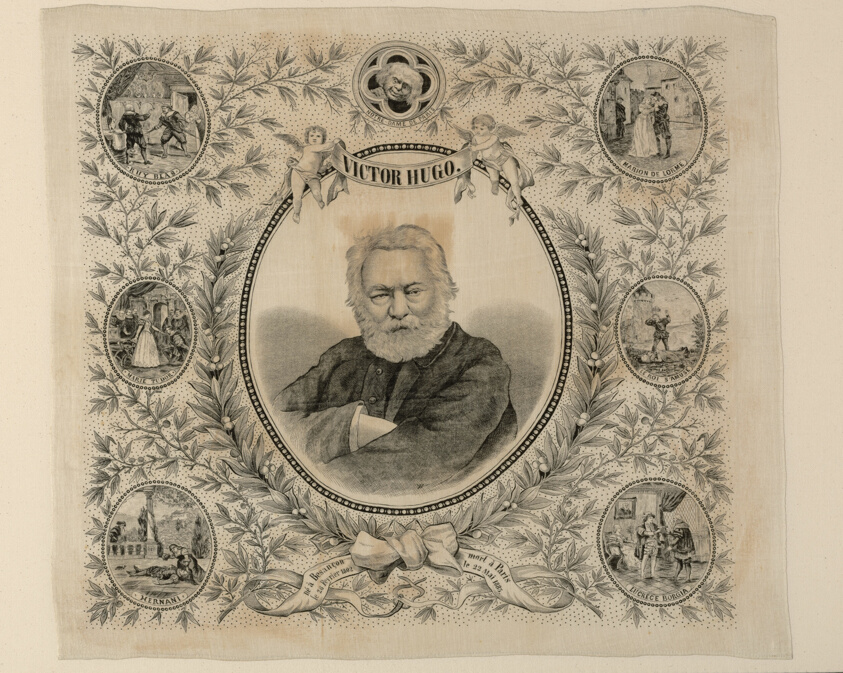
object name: Textile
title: Handkerchief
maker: After illustrations by Célestin Nanteuil (French, 1813–1873); France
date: 1860/1900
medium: Cotton, twill weave; copperplate printed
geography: France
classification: textile; weaving - printed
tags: propaganda